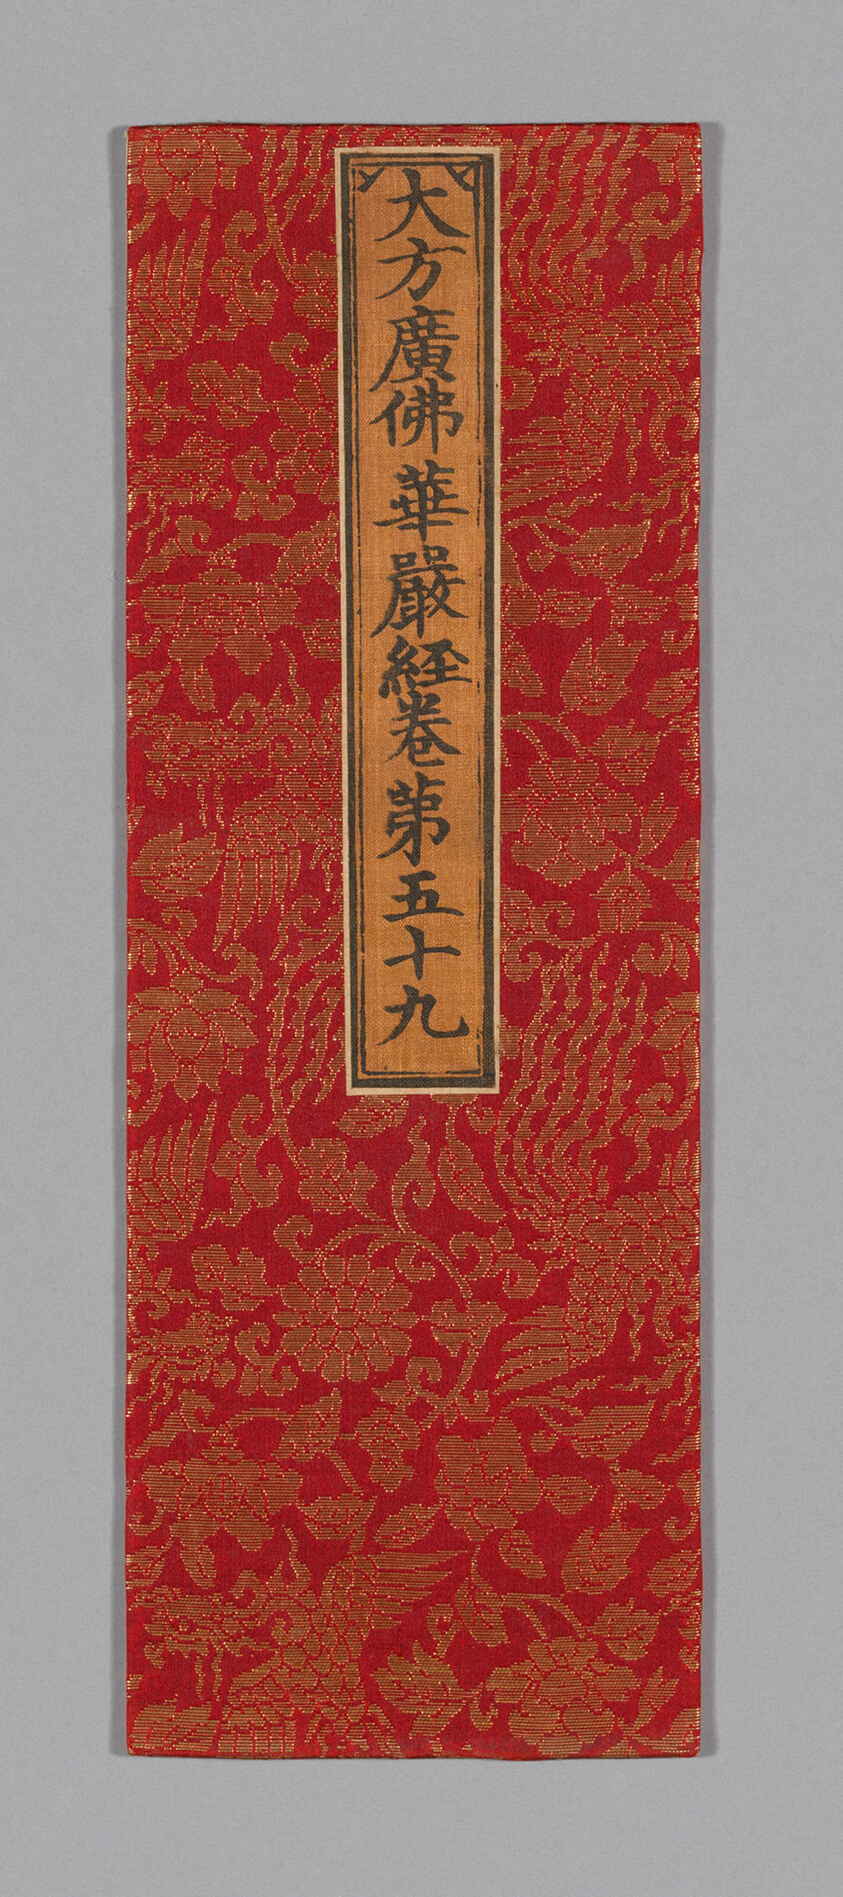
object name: Textile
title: Sutra Cover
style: ming, Chinese (culture or style), East Asian, asian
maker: China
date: Ming dynasty (1368–1644), c. 1590's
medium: Silk and gold-leaf-over-lacquered-paper strip, warp-float faced 4:1 satin weave with supplementary patterning wefts bound in weft-float faced 1:4 satin interlacings; label: silk, plain weave; painted with ink; glued over paper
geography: China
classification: textile; weaving